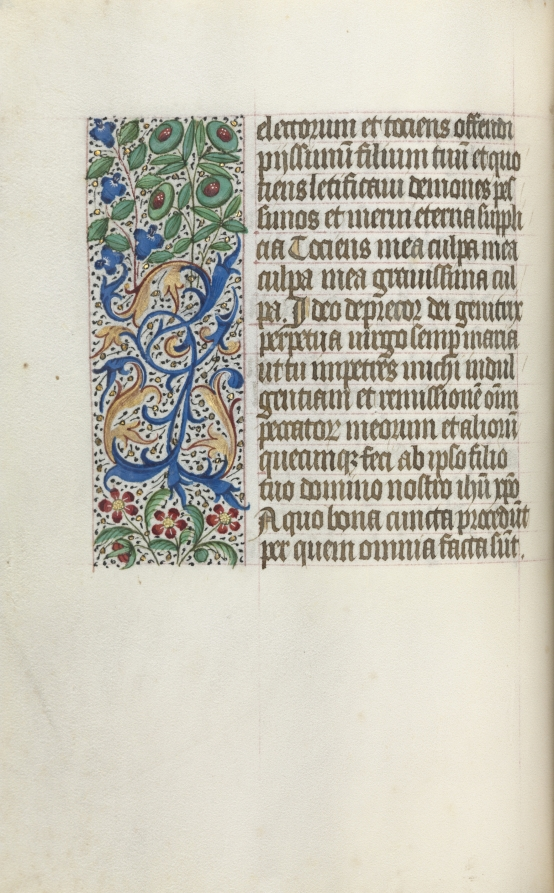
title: Book of Hours (Use of Rouen): fol. 25v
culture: France, Rouen, 15th century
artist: Master of the Geneva Latini (French, active Rouen, 1460–80)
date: c. 1470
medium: ink, tempera, and gold on vellum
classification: Bound Volume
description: In the late 1400s and early 1500s Rouen was an established and important center of book production. The city’s cathedral had a wealthy chapter that spent large sums of money to commission books and to maintain its extensive library. The stationers and booksellers would have likely been concentrated in or near the cathedral precinct. This artist, named after a manuscript now in Geneva, was Rouen’s principal illuminator during the second half of the 1400s.